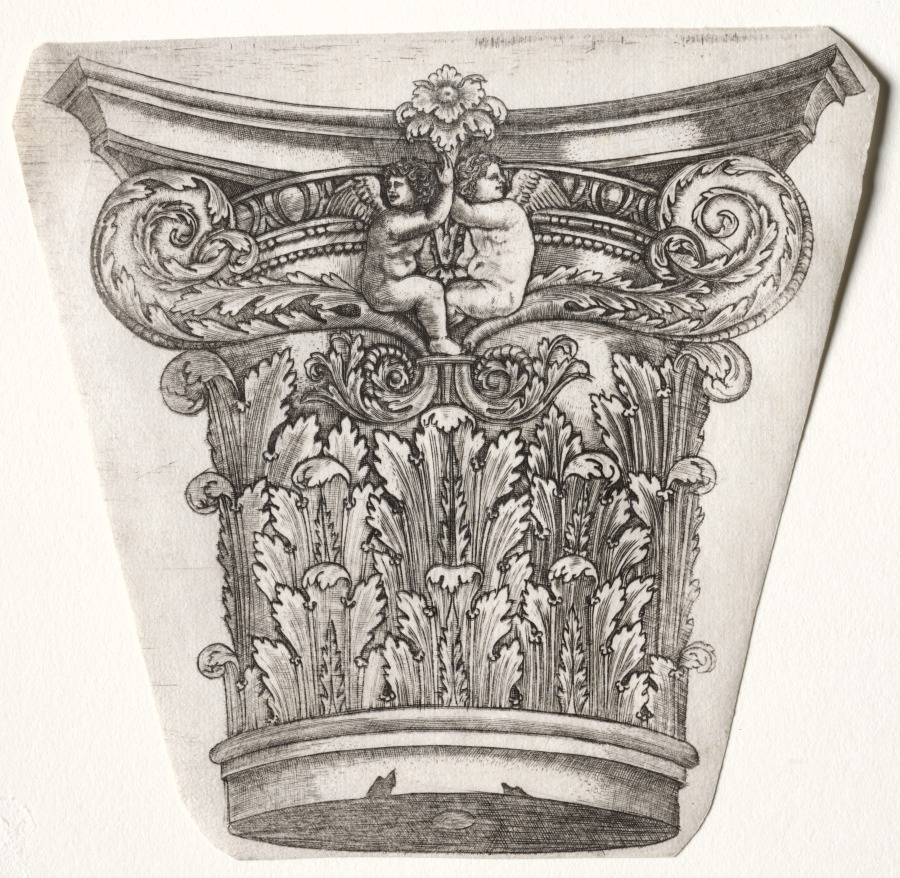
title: Base and Capital with Putti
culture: Italy, 16th century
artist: Master G. A. with the man-trap (Italian, active 1525–50)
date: c.1525–1550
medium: engraving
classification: Print